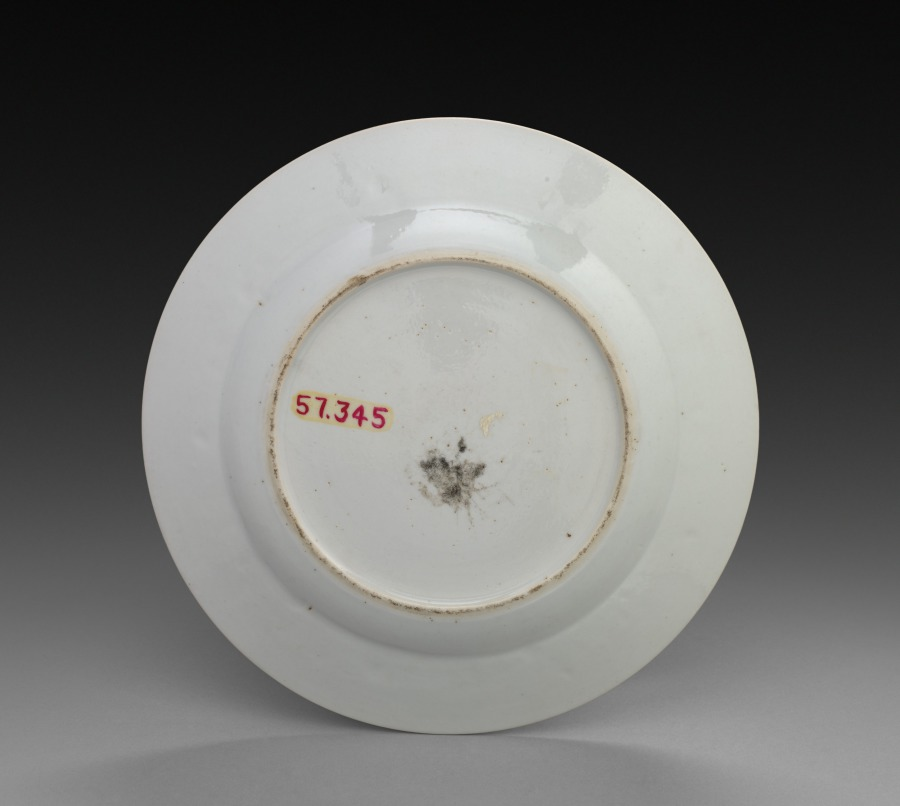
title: Plate: Female Figure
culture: China, Chinese Export, 18th century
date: 1700s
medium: porcelain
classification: Ceramic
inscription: below the figure: "ODE ZEEVAARTO."